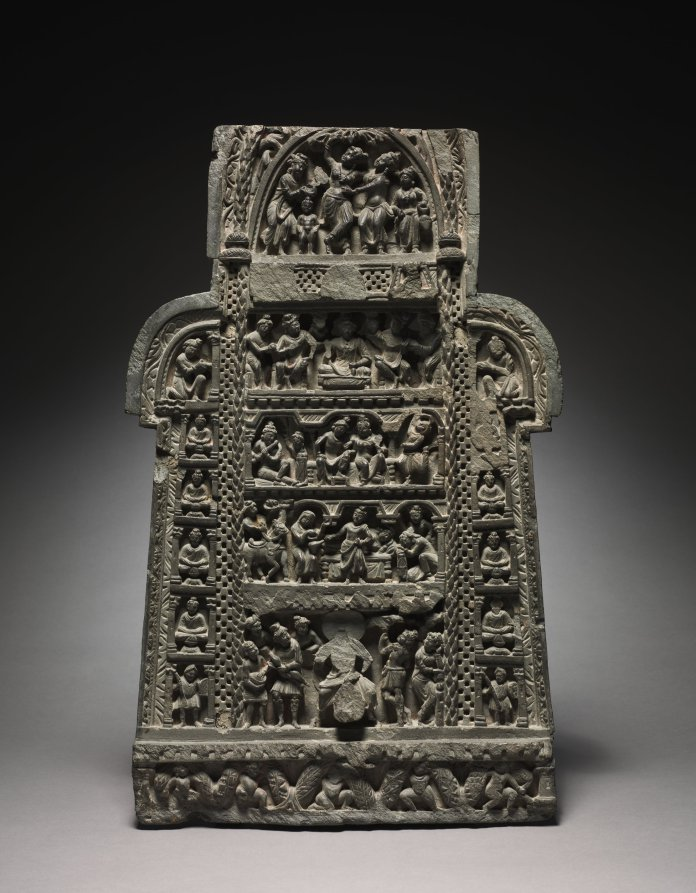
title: Scenes from the Life of Buddha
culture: Pakistan, Gandhara, Kushan period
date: 100s CE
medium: schist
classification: Sculpture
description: In this compact narrative relief, which was made to adorn a Buddhist stupa, scenes from the early life of the Buddha are depicted in order from top to bottom. His birth is at the top. The infant, now broken, is being received by Indra, King of the Gods, from the right side of his mother, who is depicted like a tree deity, grasping a branch with one hand. The baby Buddha miraculously took seven steps immediately after he was born, as indicated by the standing diminutive figure at the left of the scene. The next scene depicts the bodhisattva Maitreya, who will be the next Buddha to be born in the future, as an element of foreshadowing. Returning to the life of the historical Buddha, the sculptors then depict him as a prince, enjoying palace life with his wife. Eventually, he is compelled to leave his family to seek enlightenment and try to end the suffering in the world. In the lowest panel he rides off to the forest with a carved halo behind his head. In the border areas are meditating Buddha images, worshippers, guardians, and earth deities who drag a massive flower garland adorning the panel.